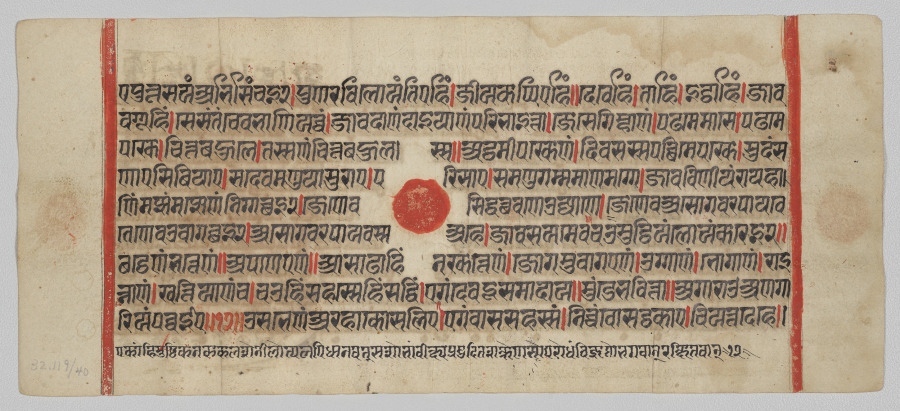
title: Text, Folio 55 (recto), from a Kalpa-sutra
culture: Western India, Gujarat, last quarter of the 15th century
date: c. 1475–1500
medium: Gum tempera, ink, and gold on paper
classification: Painting